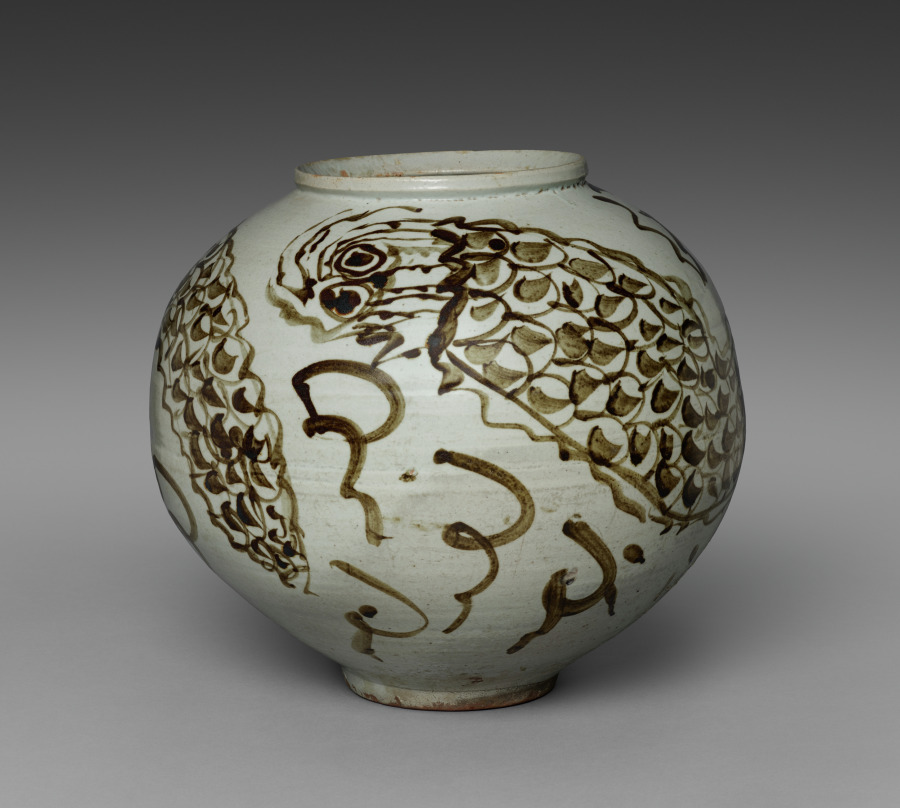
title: Jar with Dragon and Clouds Design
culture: Korea, Joseon dynasty (1392–1910)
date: late 1600s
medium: porcelain with underglaze iron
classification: Ceramic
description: In traditional Korean art, dragons were used as an emblem of royalty. Over centuries, the ways of depicting this powerful mythical creature varied in response to artistic trends and socioeconomic changes. Here, the artist imagined with free-flowing calligraphic brushstrokes a whimsical dragon with bulging eyes who wraps his scaled body around the vessel. This piece was acquired from the London Gallery in Tokyo, Japan. Its owner, Tajima Mitsuru (born about 1936) is regarded as one of the pioneering Japanese art dealers to cultivate lasting relationships directly with collectors and museums in the United States.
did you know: A mythical creature believed to have the power to make rain, the dragon is a prominent symbol of rulers in premodern East Asia; the image of dragons was used exclusively for the king's paraphernalia.